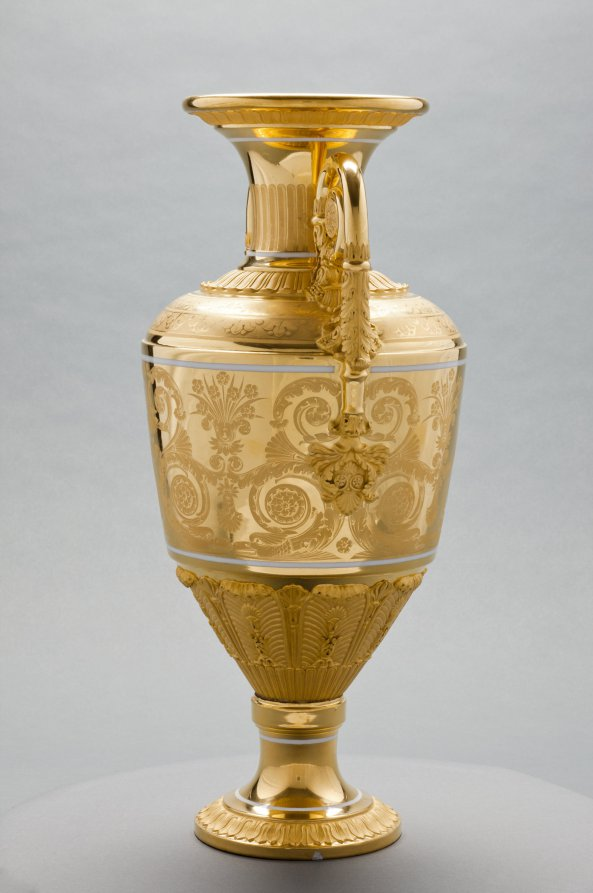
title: Vase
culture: Russia, St. Petersburg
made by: St. Petersburg Imperial Porcelain Factory (Russian)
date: c. 1820–1830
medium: gilt porcelain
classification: Ceramic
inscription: inscribed: "Moreau" in gold near lip.